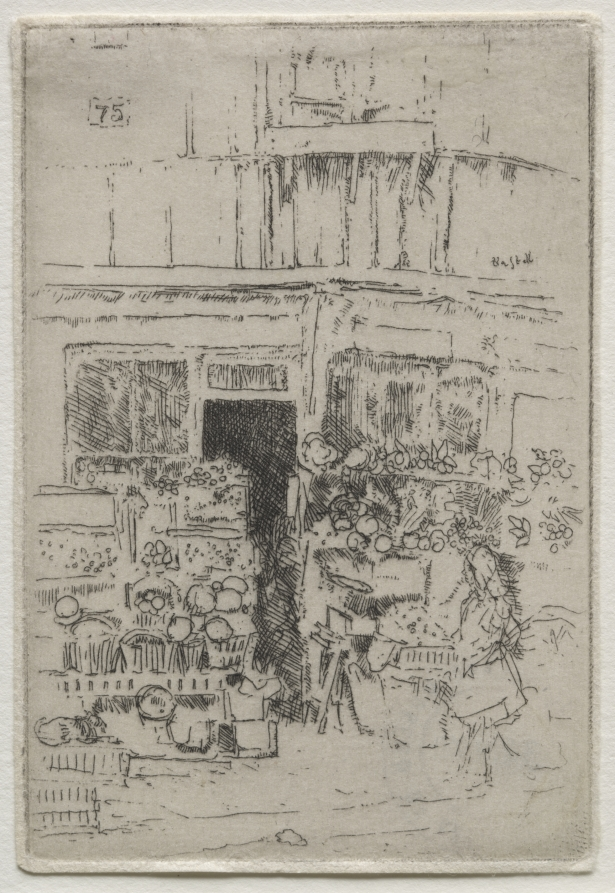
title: The American Invasion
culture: America, Ohio, Cleveland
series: 29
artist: Russell T. Limbach (American, 1904–1971)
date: c. 1929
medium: lithograph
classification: Print